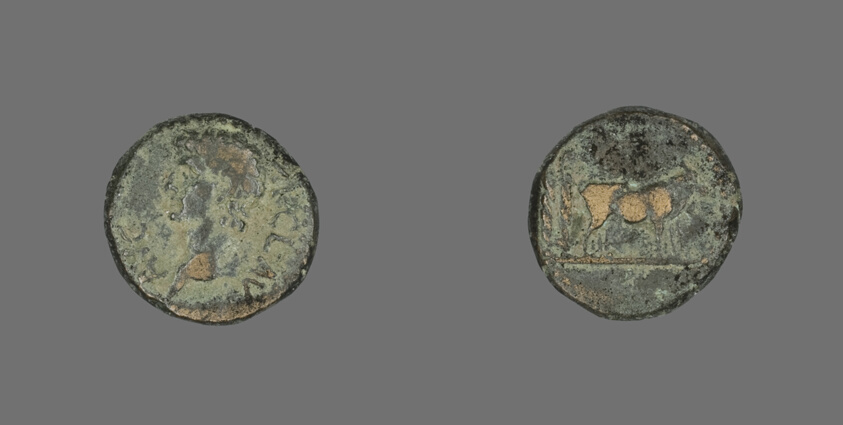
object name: Coin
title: Coin Portraying Emperor Claudius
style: roman (ancient, style or period), ancient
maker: Roman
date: 41-54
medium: Bronze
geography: Roman Empire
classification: coin; ancient art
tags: portrait